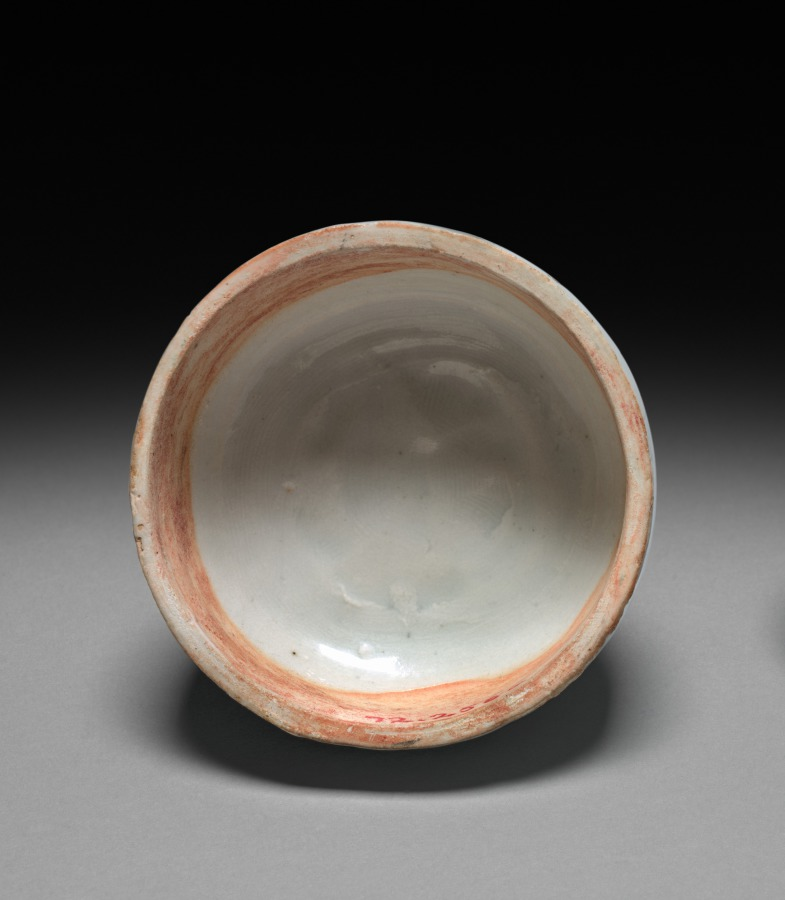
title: Circular Box: Qingbai Ware (lid)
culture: China, Southern Song Dynasty (1127-1279) - Yuan Dynasty (1271-1368)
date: 1200s-1300s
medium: glazed porcelain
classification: Ceramic